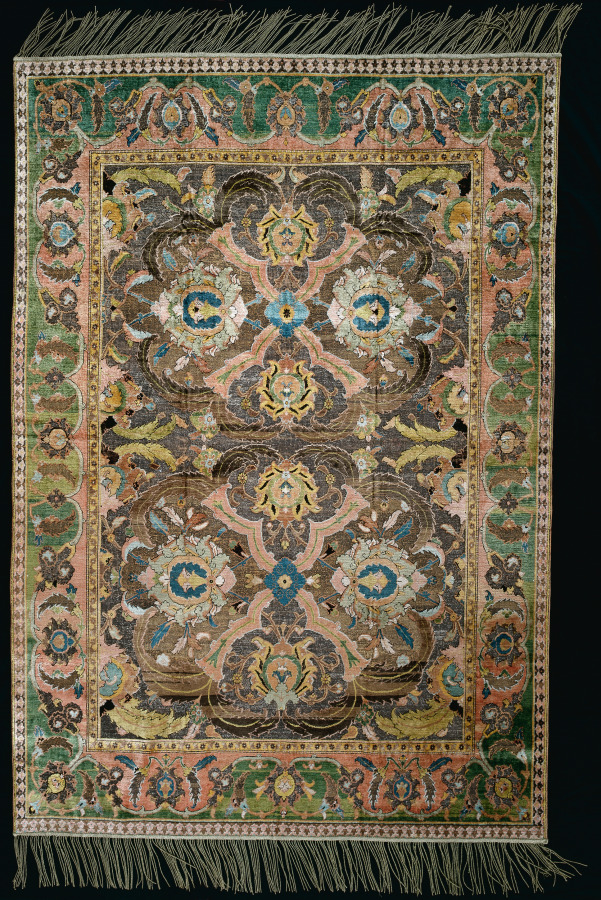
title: Royal Carpet with Silk and Metal Thread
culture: Iran, Isfahan, Safavid period (1501-1722)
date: 1600–1625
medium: Cotton: warp; cotton and silk: wefts; silk: pile, asymmetrical knot; gilt- and silver-metal thread: brocaded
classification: Carpet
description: The Safavid dynasty was the greatest dynasty from Iran in the Islamic period. Similarly, woven textiles and carpets from this period are some of the best produced in the region. Royal workshops produced luxurious textiles, like this one, to furnish the royal court. Expertly woven silks were highly prized by the Iranian elite but were also produced for export to the European aristocracy.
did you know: 16th- and 17th-century Iranian carpets with silk and metal thread were mistakenly called "Polish," based on one displayed in the Polish exhibit at the Paris World Fair in 1878.